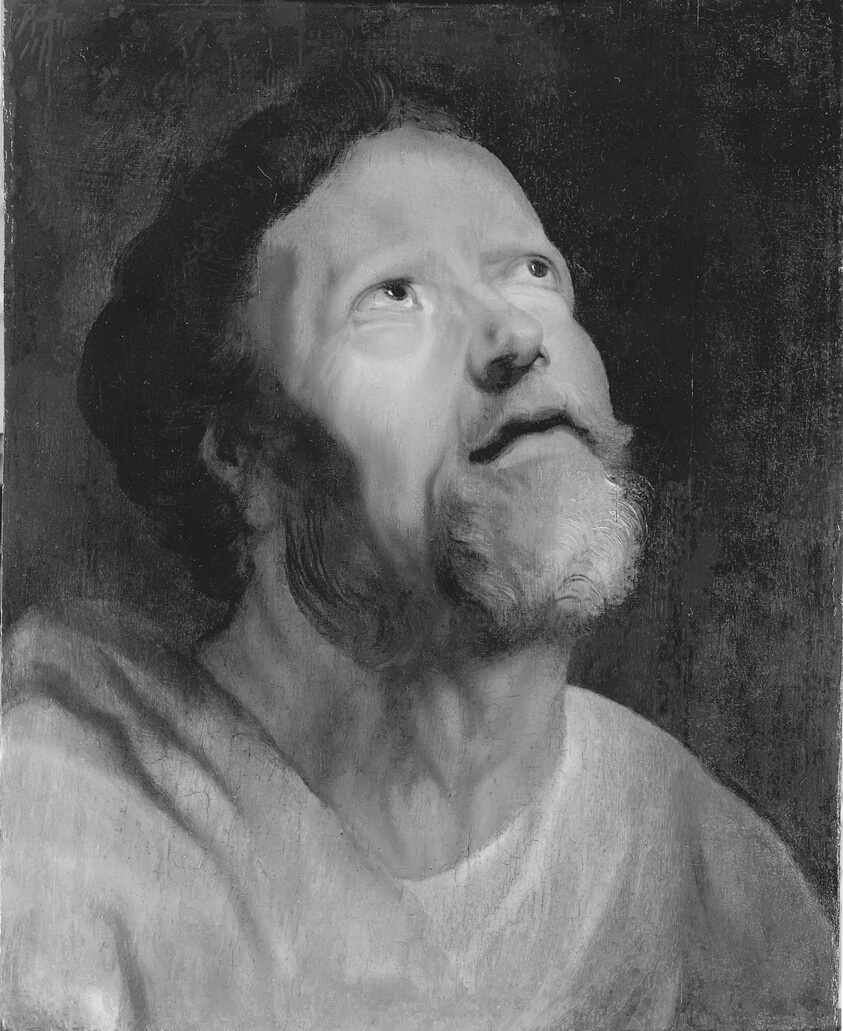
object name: Painting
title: Head of an Apostle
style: 17th Century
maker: Follower of Jacob Jordaens (Flemish, 1593-1678)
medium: Oil on panel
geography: Flanders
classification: painting; flemish; oil on panel; oil paintings (visual works); paint; european painting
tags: head, bearded man, religious, religious figures, religion, Christianity, Christian subjects, man